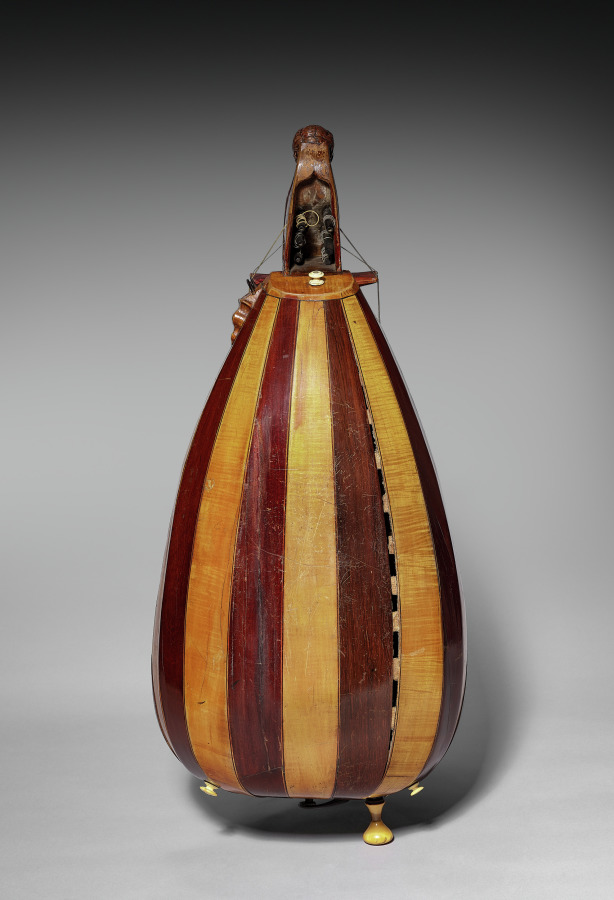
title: Vielle à roue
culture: France, 18th century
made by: Pajot of Jánzat (French)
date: 1700s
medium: wood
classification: Musical Instrument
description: The instrumentalist could play melodies on the keyboard that presses tangents against one or more strings. Often there are also multiple drone strings, which give a constant pitch accompaniment to the melody, resulting in a sound similar to that of bagpipes. This type of instrument is depicted in several artworks in the CMA collection: 1924.656, 2008.34.2, 1960.20. The vielle à roue is also related to the Swedish nyckelharpa, which was featured on the CMA performing arts series in 2017 played by Emilia Amper.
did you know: Also known as a “hurdy-gurdy” or “wheel fiddle,” this instrument produces sound by a hand crank-turned rosined wheel rubbing against the strings.